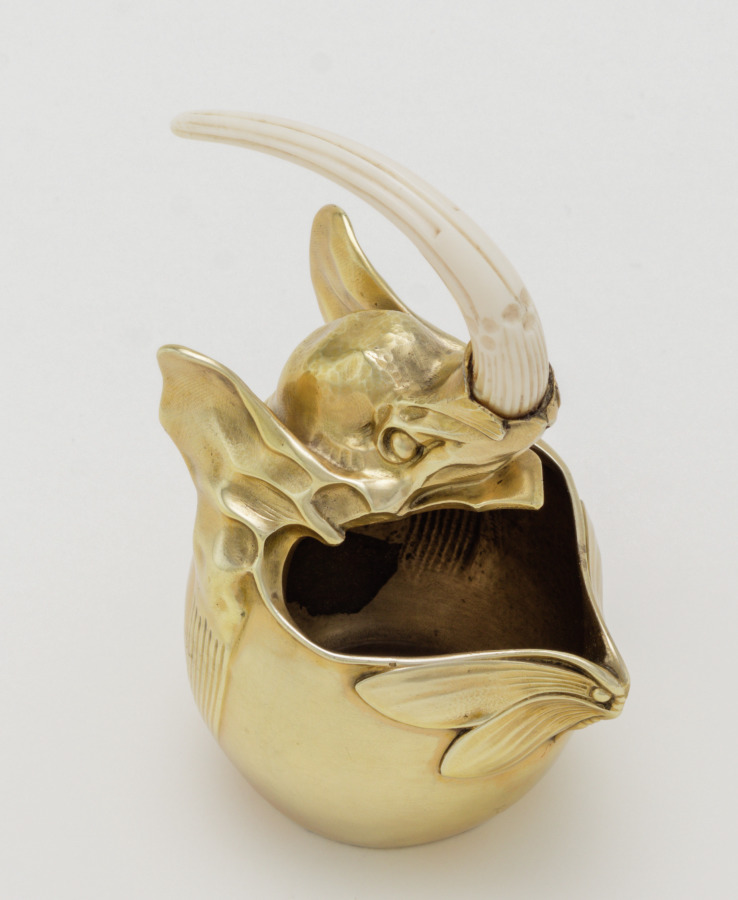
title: Creamer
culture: France, Paris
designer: Carlo Bugatti (Italian, 1856–1940)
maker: Adrien-Aurélien Hebrard (French, 1866–1937)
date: c. 1907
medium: Gilt silver and ivory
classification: Silver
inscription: Made by A. A. Hebrard Firm, Paris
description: This tea and coffee service, salver, and table, together with some now missing cups, were all designed by Carlo Bugatti as an ensemble and presented at the 1902 exposition devoted to decorative arts in Turin, Italy. The set was probably acquired from Bugatti's 1907 exhibition at the Galerie Hébrard in Paris by a wealthy South African widow, Anna Blake, who was living there at the time. Some of the animal and insect motifs suggest mythical beasts or the fossils of prehistoric animals. When Mrs. Blake returned to Cape Town, she took these and other pieces designed by Bugatti with her, and they remained in South Africa throughout her lifetime.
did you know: This creamer is part of a tea and coffee service designed by Carlo Bugatti.